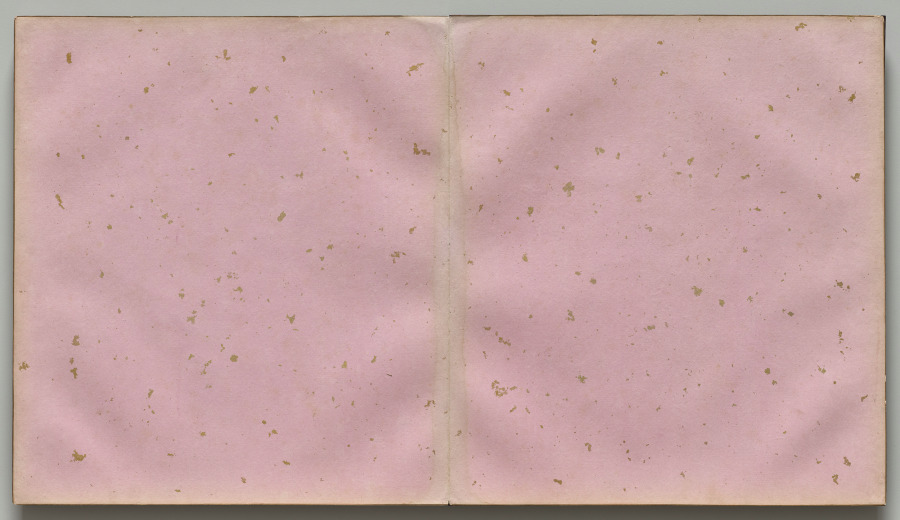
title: Absorb the Past; Abandon the Present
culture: China, Qing dynasty (1644–1911)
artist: style of Qian Hui'an (Chinese, 1833–1911)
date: 1800s–1900s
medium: Accordion-style album of 10 painted leaves; ink and color on silk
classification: Painting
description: Qian Huian, active in Shanghai, was best known for his paintings of beautiful women, and historic and mythological figures, rendered in a distinct style. His figures appear eccentric and the color palette pale to pink. The album’s title, Absorb the Past, Abandon the Present, reflect the desire to find refuge in China’s Past, as the country was going through the devastating Taiping rebellion at the time the paintings were created.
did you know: Leaf four depicts Tao Yuanming, carried by servants in a basket as he had an ailing foot. Tao wrote the Peach Blossom Spring tale, in which a fisherman loses his way and ends up in a utopia.